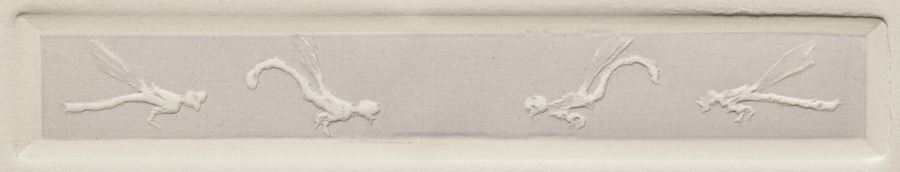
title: Decorative Motif and Standing Woman with Hands on her Head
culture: France, early 20th Century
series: La Loïe Fuller, by Roger Marx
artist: Pierre Roche (French, 1855–1922)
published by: Les Cents Bibliophiles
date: 1904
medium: gypsograph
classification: Bound Volume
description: Although best known as a sculptor, Roche was a versatile and prolific artist who worked in many mediums. Loïe Fuller, the pioneer of modern dance who took Paris by storm in 1892, was one of his favorite subjects. He portrayed her in clay, bronze, marble, plaster, and in a series of gypsographs that illustrated an essay by the art critic Roger Marx. The book was described as "a precious monument to Loïe Fuller."